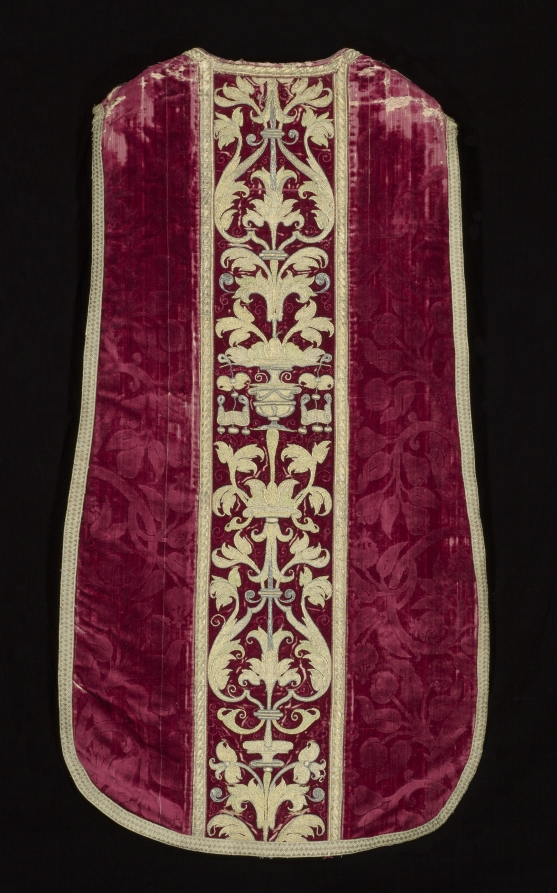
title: Chasuble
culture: Spain, late 16th century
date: late 1600s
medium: Silk, velvet, embroidery on orphrey metallic thread, or nué (shaded gold)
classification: Velvet